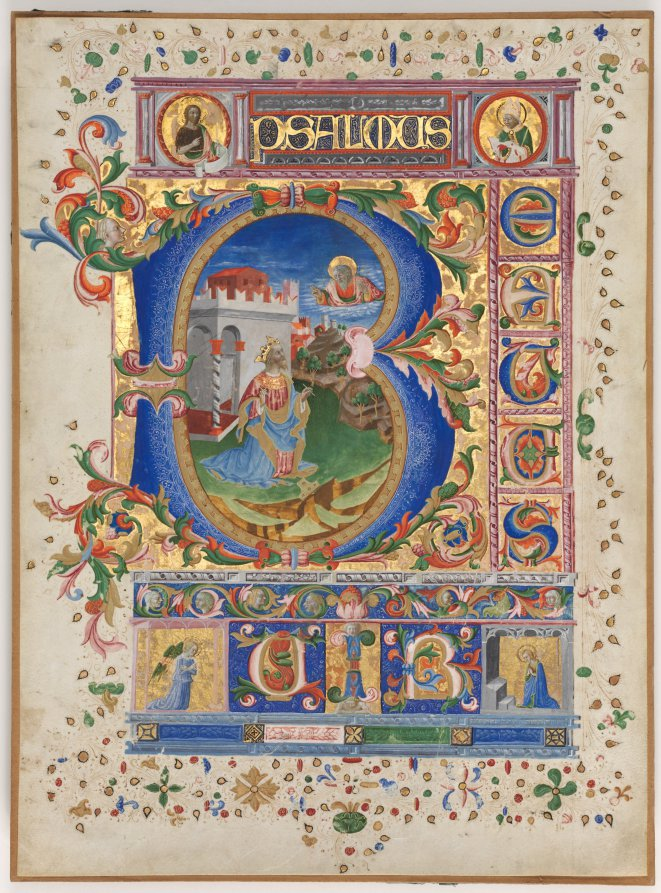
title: Leaf from a Psalter with Historiated Initial (B): King David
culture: Italy, Florence, 15th century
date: c. 1450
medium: ink, tempera, and gold on parchment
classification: Manuscript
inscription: Beatus vir qui non abit..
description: Books of hours evolved from psalters, books that contained the Old Testament book of Psalms (sacred songs) for use in churches. Psalters also included calendars, prayers for the dead, and a specific group of prayers known as the Hours of the Virgin. By the 1200s, laypeople were requesting psalters without the cumbersome psalms, and thus the book of hours was born. This leaf contains Psalm 1, which begins with a large, decorated B containing an image of King David kneeling with a plucking instrument on the ground. The text says beatus vir qui non abit, or “blessed is the man.”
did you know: The larger size of this leaf indicates it could be used by a group of readers.